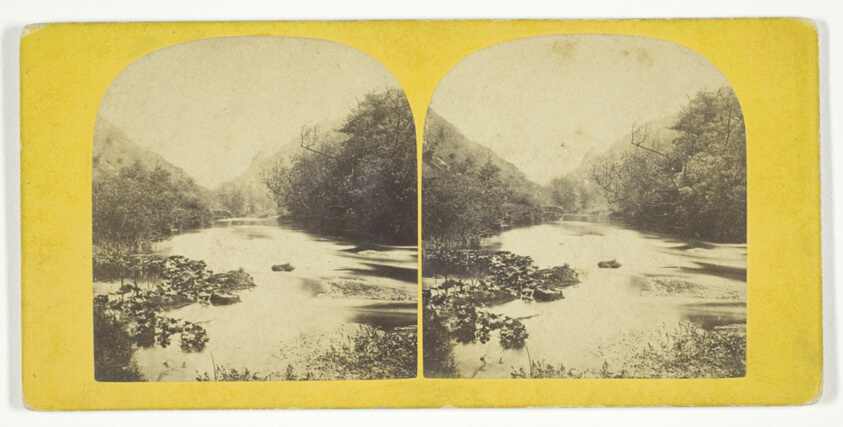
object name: Photograph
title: The Rock called "Dovedale Church," In the distance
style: 19th century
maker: W. Woodward (English, active mid-19th century)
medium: Albumen print, stereo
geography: England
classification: stereograph (albumen); albumen silver print; photographic process; photography; photograph